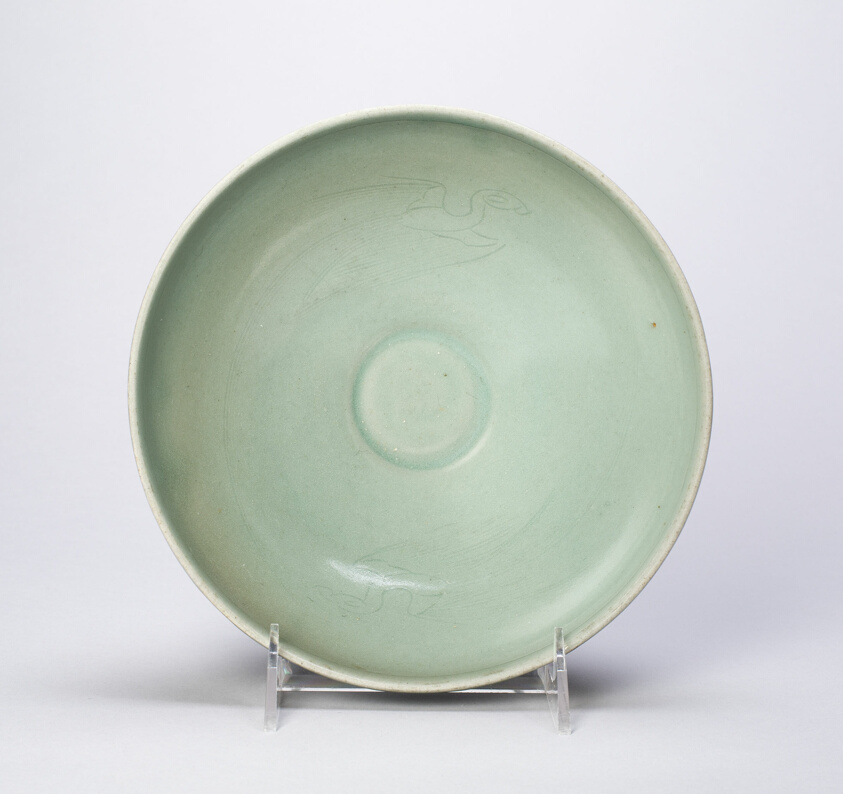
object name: Vessel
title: Bowl with Parrot Motifs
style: Korean (culture or style)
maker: Korea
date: Goryeo dynasty (918–1392), 12th century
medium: Stoneware with celadon glaze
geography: Korea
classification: bowl; stoneware; dish (vessel); asian art; ceramics; vessel